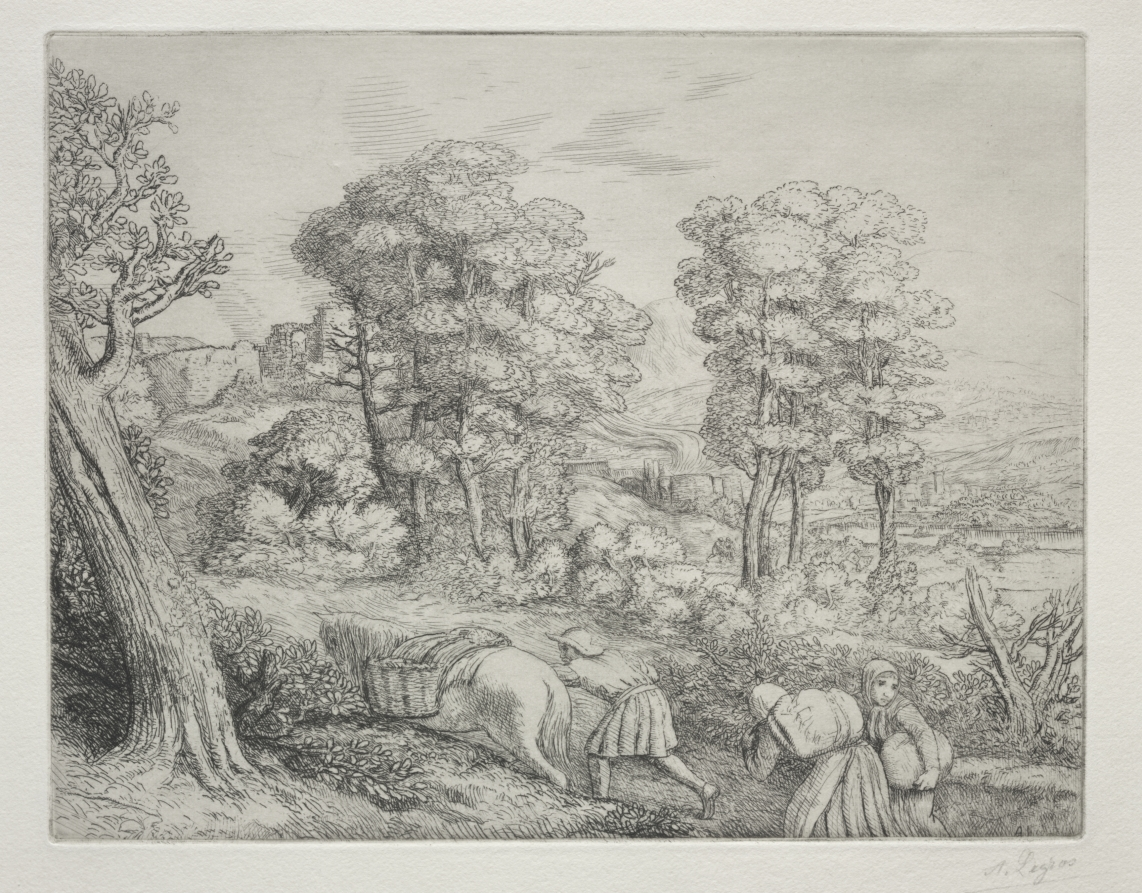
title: The Return to the Farm (Le Retour à la Ferme)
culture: France, 19th century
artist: Alphonse Legros (French, 1837–1911)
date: c. 1857–1911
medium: drypoint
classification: Print